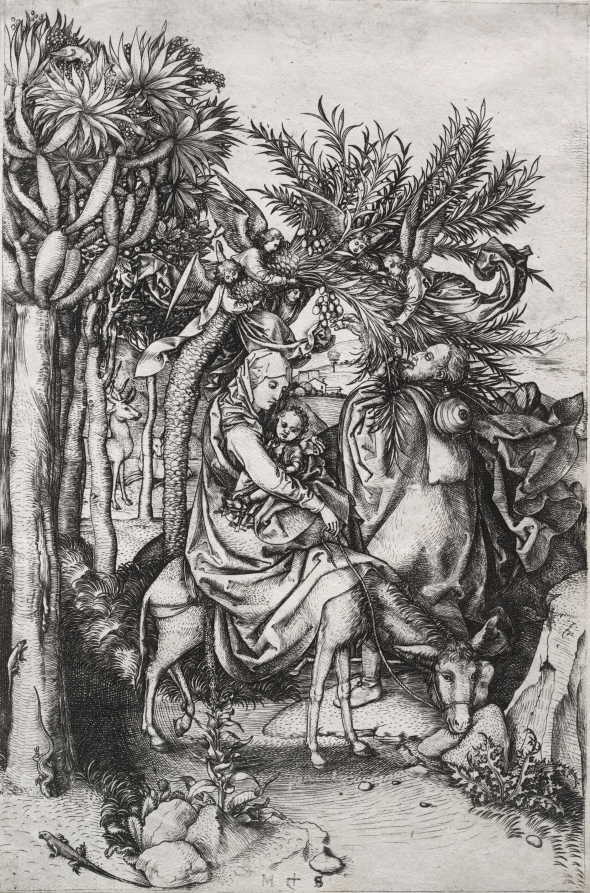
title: The Flight into Egypt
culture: Germany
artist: Martin Schongauer (German, c. 1450–1491)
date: 1470–74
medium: engraving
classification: Print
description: According to the apocryphal Gospel by Pseudo-Matthew, while resting in Egypt after fleeing the Massacre of the Innocents and their home in Israel, the Virgin Mary asked Joseph to harvest some dates from a palm. As Joseph could not reach the fruits on the three, Jesus ordered the plant to bend down. Martin Schongauer's print is clearly inspired by this episode. the Virgin Mary is shown holding him and riding on a donkey, which is momentarily resting under a palm. Five hovering angels are pulling down the top of the tree to enable Joseph to pick dates. This print belongs to a set of four engravings considered to be an incomplete series of episodes of the Life of the Virgin, which also include The Nativity (1939.448), The Adoration of the Magi (1942.1070), and The Death of the Virgin (1956.744).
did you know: The inclusion of tropical details such as the dragon tree, parrot, and lizards could be evidence of Martin Schongauer's trip to Spain during his Wanderjahre (apprenticeship trip) in the 1460s.